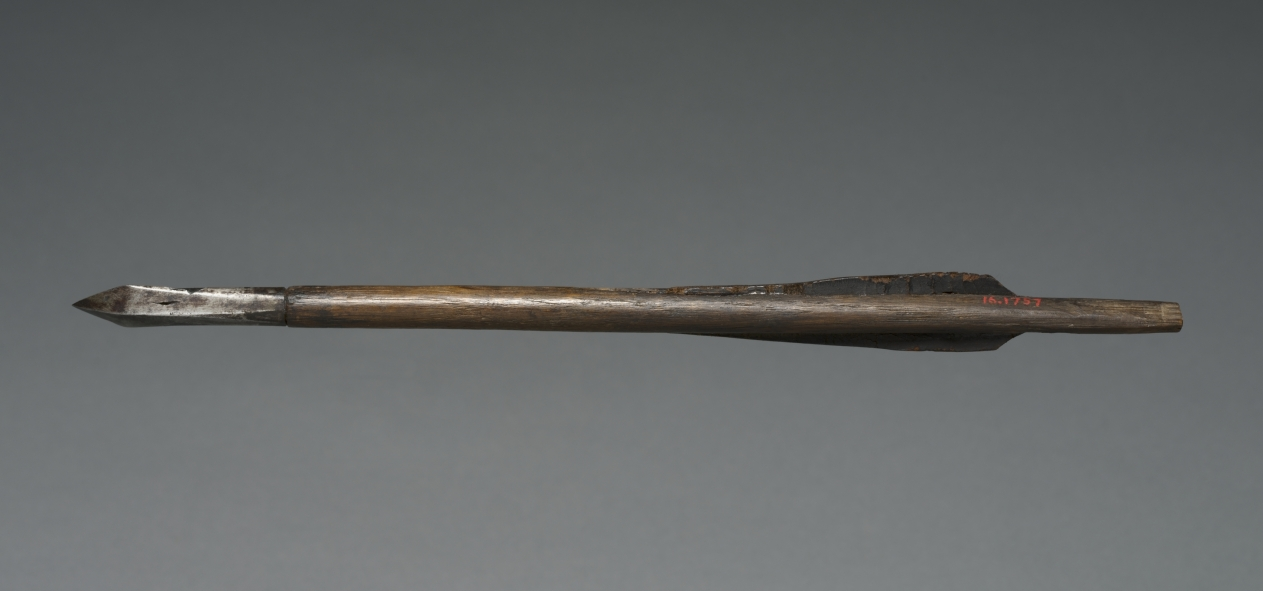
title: Crossbow Bolt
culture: Germany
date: 1500s–1600s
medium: wood, leather, steel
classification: Arms and Armor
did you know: Bolts with leather feathering were used mainly in the Tyrolean area, which includes northern Italy and western Austria.